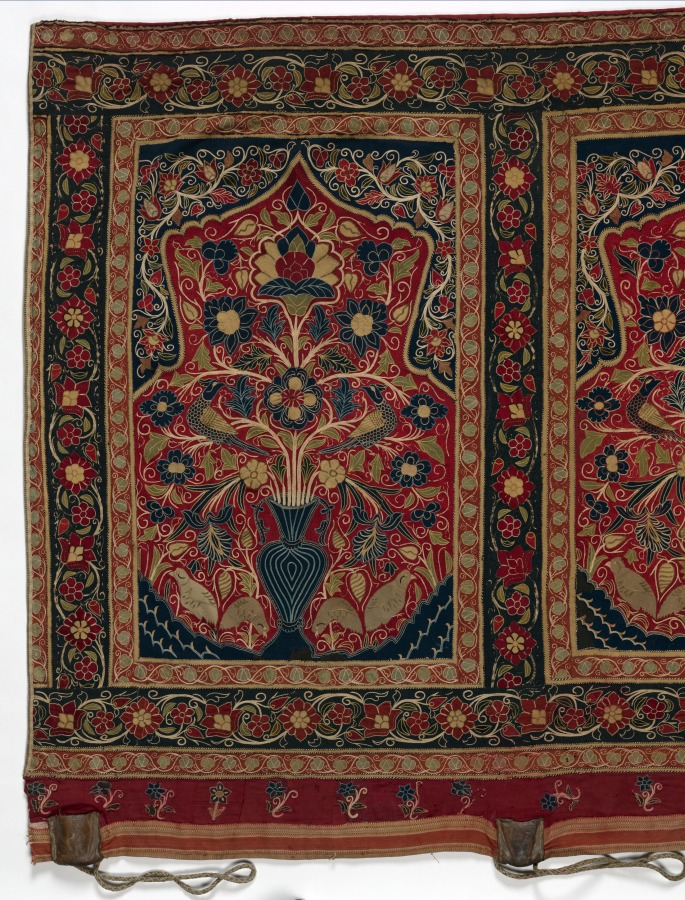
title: Royal Round Tent made for Muhammad Shah (wall panel with three design units)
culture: Iran, Rasht, Qajar period (1779-1925)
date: 1834–48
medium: Interior: wool: plain weave, inlaid work; silk: embroidery, chain stitch; tape, leather; Exterior: cotton, wool: plain weave; rope, iron ring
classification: Textile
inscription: Inscriptions: The central design unit of this wall panel has two embroidered inscriptions. 1. Upper inscription (center of the top blossom): "Muhammad shah sultan-e ghazi."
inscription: 2. Lower inscription (on the base of the vase): "Kamtarin bandeh-ye dargah fath'ali."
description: Royal tents were potent symbols of authority, wealth, and power throughout the greater Middle East. Rulers owned thousands of tents. They were used for shelter, shade, and innumerable functions in tent compounds that were essential for imperial ceremonies, travel, and military campaigns. Distinguished by size with elaborately decorated interior walls and ceilings, tents could be as large as castles. Opulent tents were also presented as imperial gifts. Tents are only known through documents before 1600. For example, in Baghdad in 809, Caliph Harun al-Rashid owned 4,000 ceremonial tents and 150,000 camping tents that were stored in the imperial Abbasid treasury. An astonishing variety and quantity of tents were housed in the royal Fatimid tent storeroom in Cairo in 1068-69, including "military tents, fortress tents, and castle tents, manufactured of . . . gold-brocaded stuff embroidered with designs of elephants, wild beasts, horses, peacocks, birds." Since 1600, Ottoman Turkish tents with elaborate floral decoration have been preserved in Istanbul in the Topkapi Palace Museum and Military Museum, and in European collections as war booty, primarily from the Ottoman Turks' attempt to conquer Vienna in 1683. These tents are not done in the Rasht technique, but rather are applique. In contrast, royal tents from Iran are extremely rare. This spectacular ceremonial tent is embroidered with the name of its owner, Muhammad Shah, who ruled Iran from 1834 to 1848 during the Qajar dynasty. The radiant jewellike interior features exuberant flora, blossoming vines, and robust birds made with colored wool embellished with silk-thread embroidery.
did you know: Rasht work is named after the city on the Caspian Sea in present-day Iran, which was a major silk trade center with numerous textile workshops.